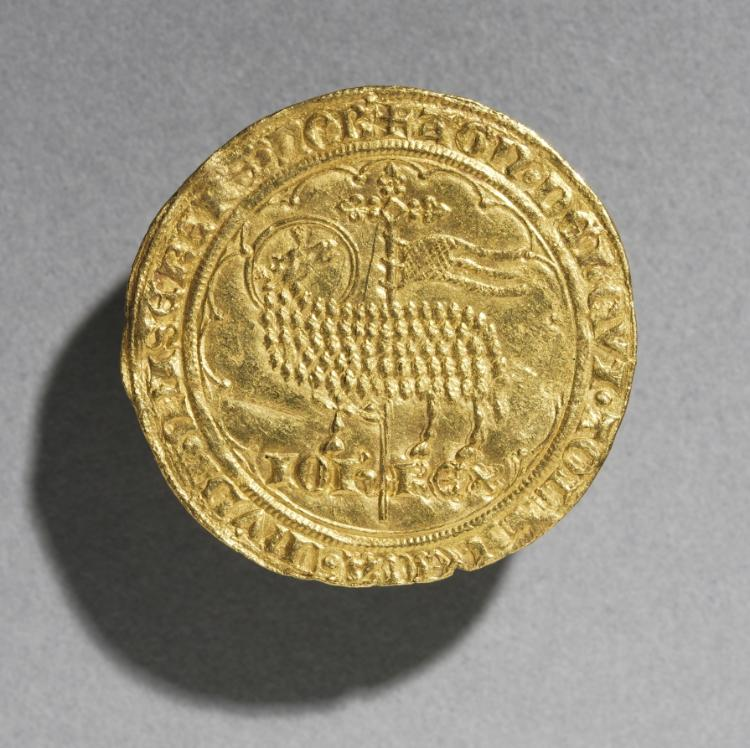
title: Mouton d'Or of King Jean le Bon of France, 1350-1364 (obverse)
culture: France, Gothic period, 14th century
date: 1350–1364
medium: gold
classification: Coins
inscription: haloed Paschal Lamb, holding a staff with a floriate cross and framed with a near-circle of single arches and inscribed: AGN.DEI.QVI.TOLL.PECA.MVDI.MISERERE.NOB; inscription directly below the Pascal lamb: IOH.REX.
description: Because this gold coin represents the Paschal Lamb, a symbol of Christ, on one of its faces, it is known as a "Golden Sheep"--Mouton d'Or in French.